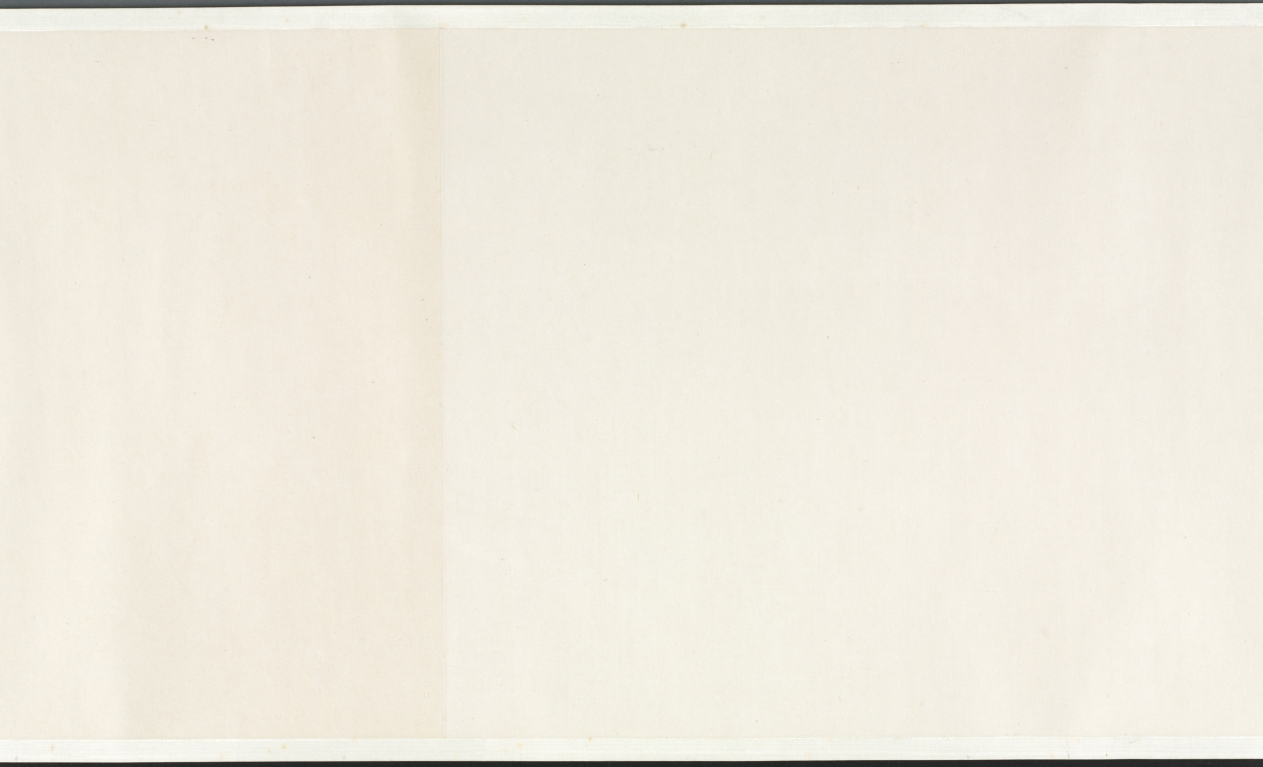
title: Buddha's Conversion of Five Bhiksu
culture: China, Yuan dynasty (1271–1368)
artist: Li Sheng (Chinese, active c. 1324–after 1375)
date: mid-1300s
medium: handscroll; ink on paper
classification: Painting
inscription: 紫篔生李升識 [印] 李氏子雲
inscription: 4 colophons and 12 additional seals: The "Heart" Sutra (Maha Prajnaparamita) text written by Wu Yuqing 吳餘慶 (active early 1400s); 2 seals of Xu Qianxue 徐乾學 (1631–1694); 3 colophons, one dated 1929 and two dated 1936, and 9 seals of Wu Hufan 吳湖帆 (1894–1968); 1 colophon, dated 1932, of Chen Dingshan; 1 seal unidentified.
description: This episode stems from the life of the historical Buddha, who, after his enlightenment, was initially hesitant about preaching his own doctrine. After much personal deliberation and prodding by deities, he finally relented. The first converts were the five guards who served him when he was still a prince. For Li Sheng, this is the pretext of the painting, which moves from the interaction of the bhiksu with the Buddha to a broader awareness of the vast surroundings of the scene.